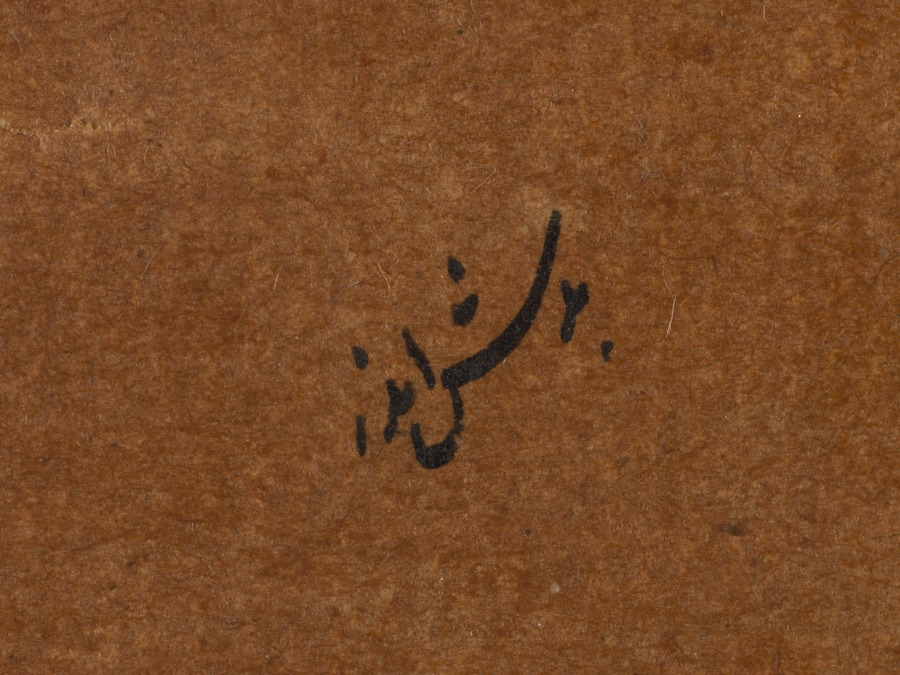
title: Bijan killing the wild boars of Irman, from a Shah-nama (Book of Kings) of Firdausi (Persian, about 934–1020) (verso)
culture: India, Bijapur, Deccan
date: c. 1610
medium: Gum tempera, ink, and gold on paper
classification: Painting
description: This illustrated page from a Shah-nama depicts the first adventure of the hero Bijan, son of an Iranian knight. When reports arrived at the king’s court of wild boars ravaging the borderlands between the enemy realms of Iran and Turan, Bijan volunteered to hunt and kill the beasts, much to the chagrin of his father, who doubted his young son’s ability to navigate the politically volatile situation. The fearless Bijan is shown on horseback as he singlehandedly strikes the bodies of the boars in the brush. After overzealously celebrating his success, Bijan must be rescued from a pit by Rustam. This early manuscript from the Deccan made for the sultan of Bijapur is characterized by glowing colors and lavish use of gold.